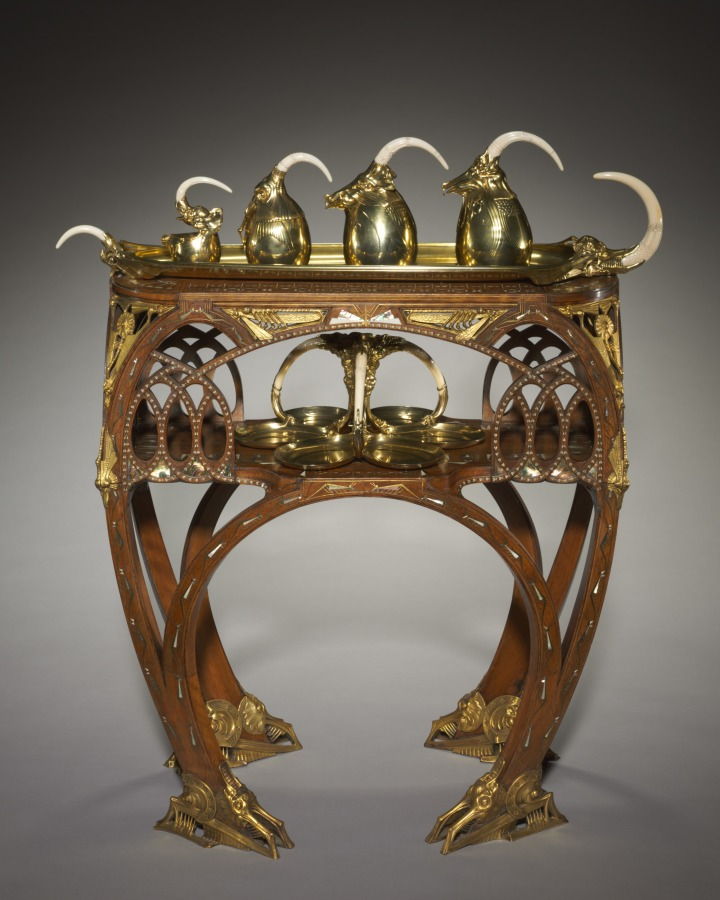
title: Tea Table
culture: France, Paris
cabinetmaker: Carlo Bugatti (Italian, 1856–1940)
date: c. 1907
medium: inlaid wood (mahogany?), cast and gilded bronze mounts, inlays of ivory or bone, metal, and mother-of-pearl (marine mussels or pearl oysters)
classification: Furniture and woodwork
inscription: signed in ligature in white metal inlay on central shelf: Bugatti.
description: Luxurious materials might catch the eye first, but a closer look reveals the imaginary creatures that adorn the surface of this table. Featuring elaborate arches, a favorite motif that appeared throughout Bugatti's furniture, this fantastical imagery is a window into the designer's expressive imagination.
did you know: Carlo Bugatti's sons achieved illustrious careers of their own. Rembrandt Bugatti (1884-1916) became a celebrated sculptor, and Ettore Bugatti (1881-1947) manufactured luxurious automobiles and racing cars.